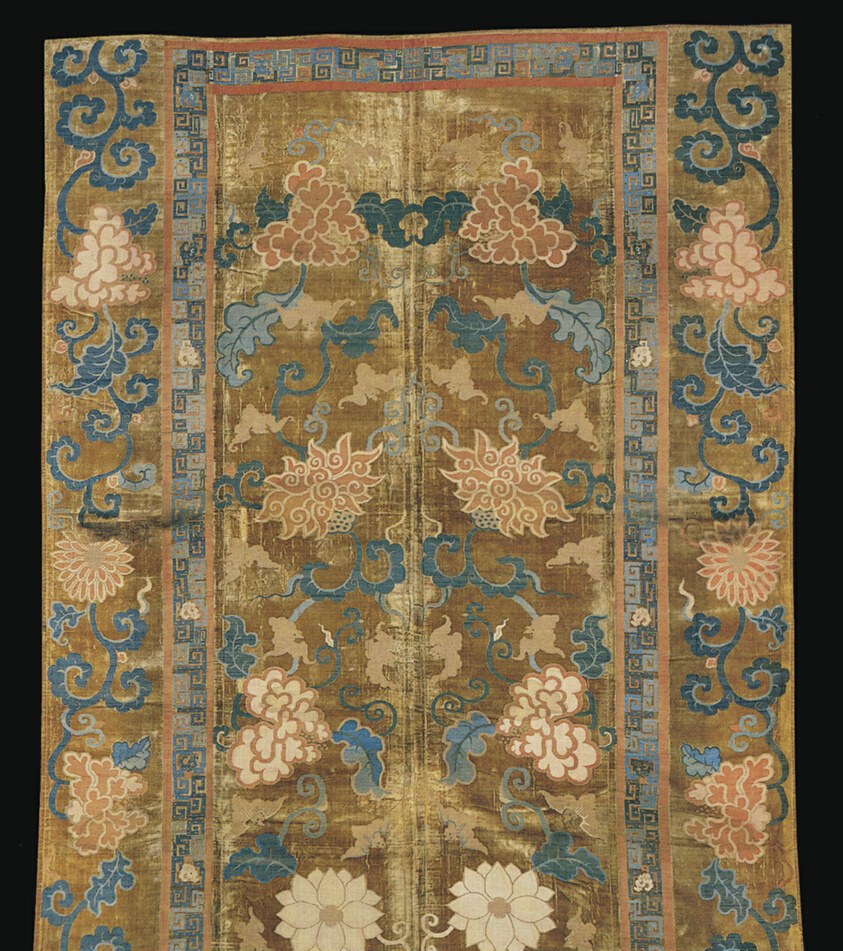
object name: Textile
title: Incomplete Carpet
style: qing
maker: China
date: Qing dynasty (1644–1911), 1730s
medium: Silk, warp-float faced 3:1 'Z' twill weave with plain interlacings of secondary binding warps and supplementary brocading wefts, and with supplementary pile warps forming cut voided velvet; edged with silk, weft-float faced 1:7 satin weave with supplementary pile warps forming cut solid velvet; four panels joined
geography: China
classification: weaving - carpet; weaving; weaving - velvet; textile